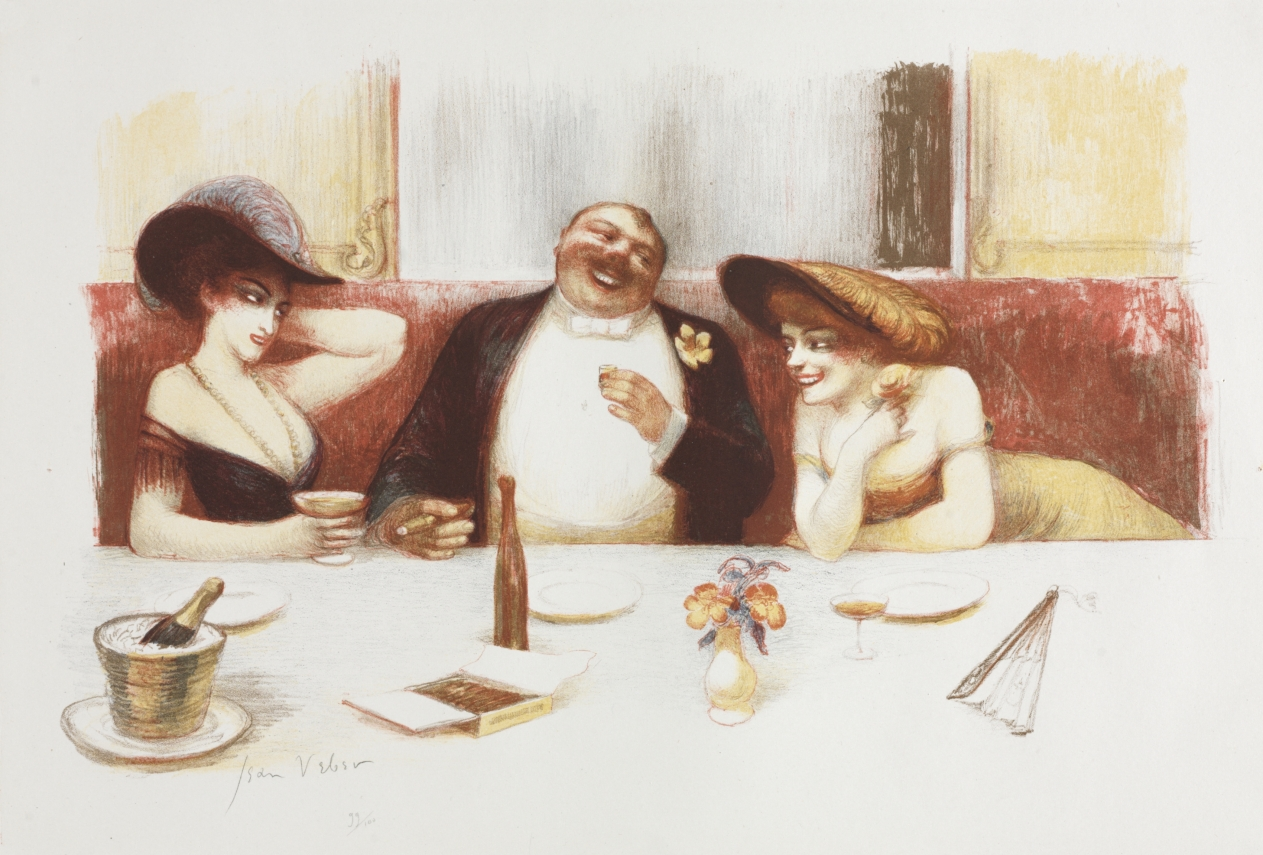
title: Chez Durand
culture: France, early 20th Century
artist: Jean Veber (French, 1864–1928)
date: 1904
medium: color lithograph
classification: Print